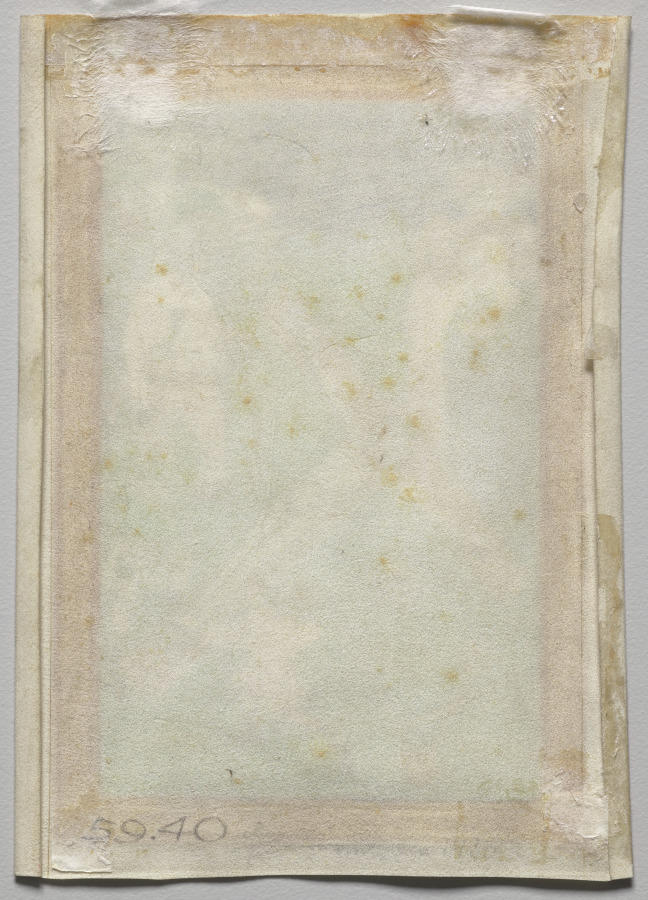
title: Leaf from a Book of Hours: Christ Being Nailed to the Cross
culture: Austria, Vienna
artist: Master of the Maximilian Schoolbooks (Austrian)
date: c. 1465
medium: ink, tempera, and gold on vellum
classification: Manuscript